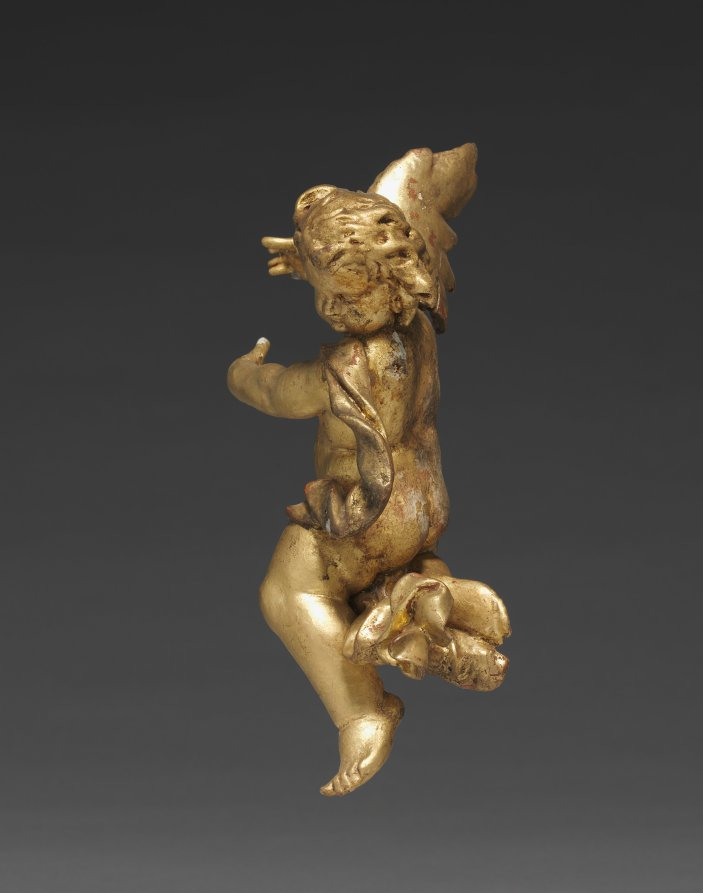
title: Altarpiece with Relics - Putto with column, upper right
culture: Germany, Bavaria, 18th century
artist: Joseph Matthias Götz (German, 1696–1760)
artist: and Workshop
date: 1735–1740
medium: gilded wood, with relics in niches: gilded wood, mother-of-pearl, ebony, red silk, gold wire, seed pearls, rock crystal, pen and ink on paper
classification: Sculpture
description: Götz covers every surface in gold leaf, giving each part of the object equal importance, rather than simply framing a central picture. In this distinctively Central European approach, figural narrative is subordinate to the overall ensemble. Götz designed this object to rest on top of an altar, probably in front of a larger painted or sculpted decorative scheme. The work contains relics seen through the small windows on the perimeter. These small remains of holy figures demonstrate the persistence of a medieval Catholic tradition well into the 1700s.